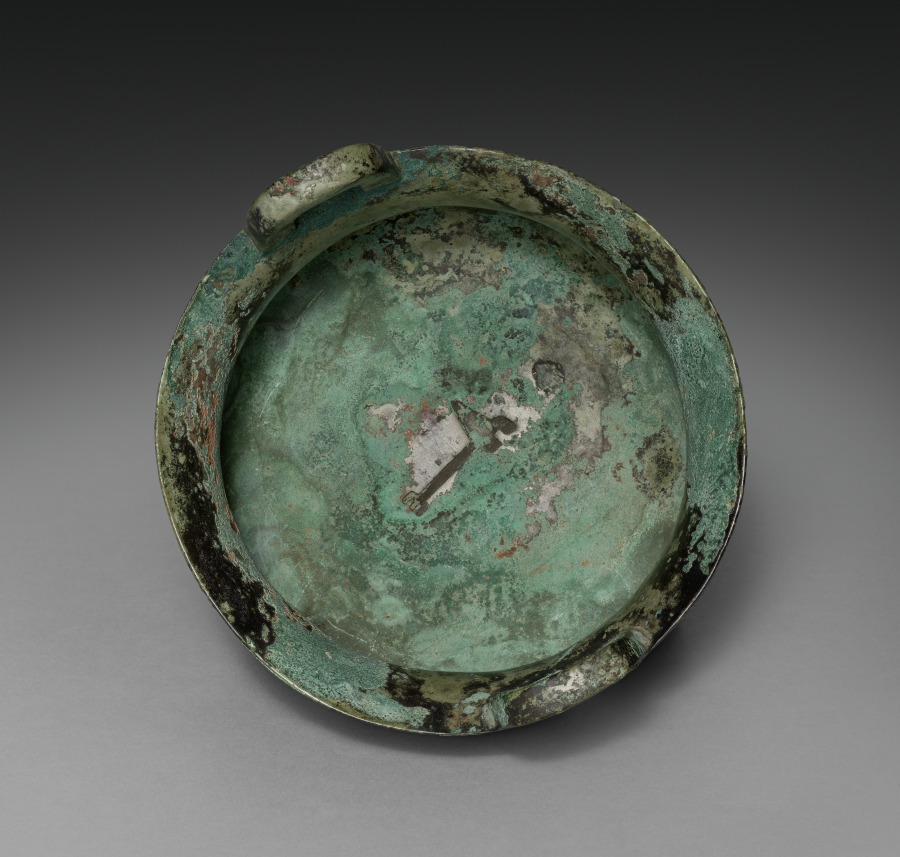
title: Tripod Cauldron (Ding)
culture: China, Shang dynasty (c. 1600–c. 1046 BCE)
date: 1200–1100 BCE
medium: bronze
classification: Metalwork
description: In ancient China, bronze tripods of the type called ding were made in sets of different sizes to be used in rituals in which grain and meat was offered to the spirits of the ancestors. These bronzes were subsequently both collected items and major scholarly preoccupations in Chinese history. They were prized art treasures that provide source materials for Chinese historiography and antiquity studies. Catalogues of archaic bronzes have been published since the Song dynasty. Scholars studied the bronze inscriptions, typologies, and terminologies, and these studies exerted an impact in the field well before the birth of modern art history and archaeology.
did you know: The vessel shows a band of silkworms and cicadas in two registers.